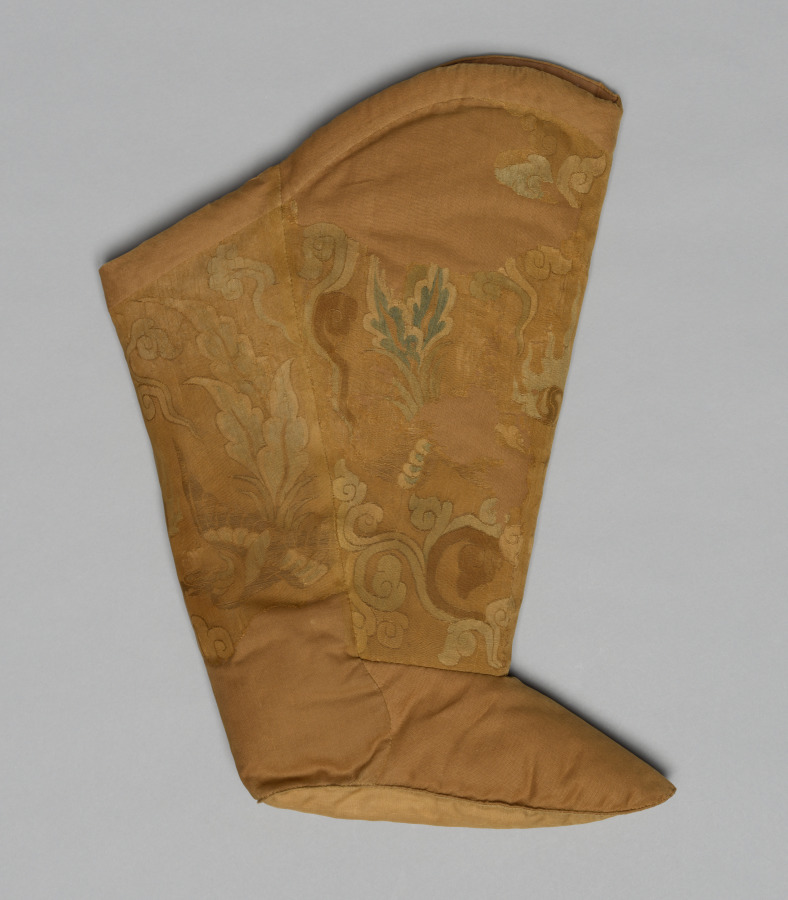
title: Boot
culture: Northern China, Liao dynasty (907-1125)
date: 907–1125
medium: Silk: tapestry weave; two kinds of metal threads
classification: Textile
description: The kesi outer fabric of the boots is woven with pairs of phoenixes chasing a flaming pearl among clouds. The sections were carefully cut so that the flaming pearl occurs at the centers of the shin and calf, and at the top of the instep. To accommodate the particular cut and smaller area of the instep, the phoenixes were depicted slightly differently and the design was reduced in scale. The wide cut of the top of the boots enabled pants to be tucked inside. Skirts, jackets, robes, gloves, and a hat would have completed the outfit. Liao kesi is distinguished by its exceptional refinement. Considered a national specialty, it was used extensively for both clothing and furnishings. Not only were kesi robes worn by the Liao emperor, but they were sent to the Song emperor as imperial gifts.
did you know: The once lavish use of gold and the Chinese-inspired phoenix motif suggest that the boots were made for a member of the Liao imperial family, probably a woman.